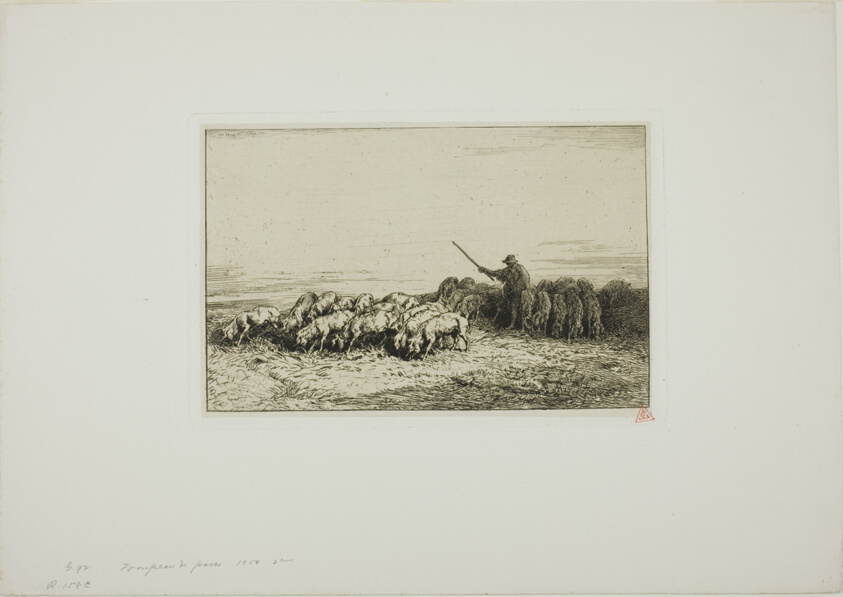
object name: Print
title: Herd of Pigs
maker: Charles Émile Jacque (French, 1813-1894)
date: 1850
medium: Etching on China paper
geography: France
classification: etching; print; prints and drawing